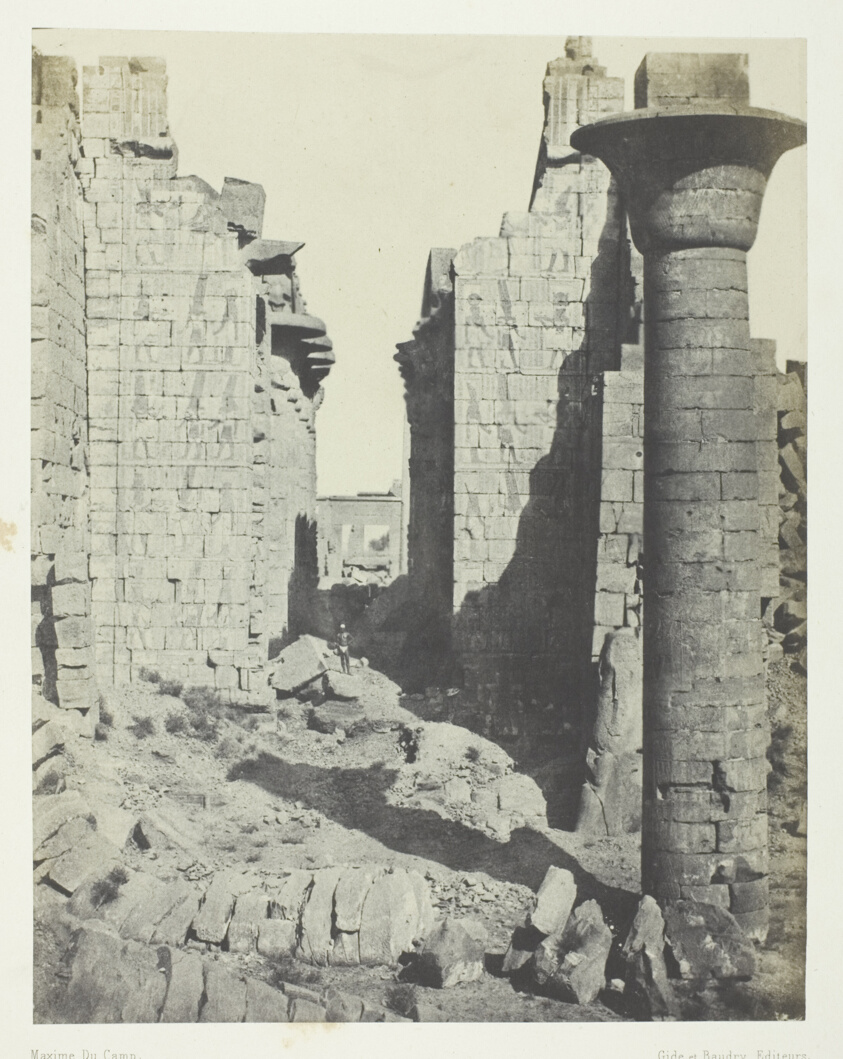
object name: Photograph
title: Palais de Karnak, Cour des Bubastites et Entrée Principale de la Salle Hypostyle; Thèbes, plate 37 from the album "Egypte, Nubie, Palestine et Syrie" (1852)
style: 19th century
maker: Maxime Du Camp (French, 1822–1894)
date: 1849/51, printed 1852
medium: Salted paper print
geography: France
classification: salted paper print; photographic process; photography; photograph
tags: Collected by Hugh Edwards, Egypte, Nubie, Palestine et Syrie